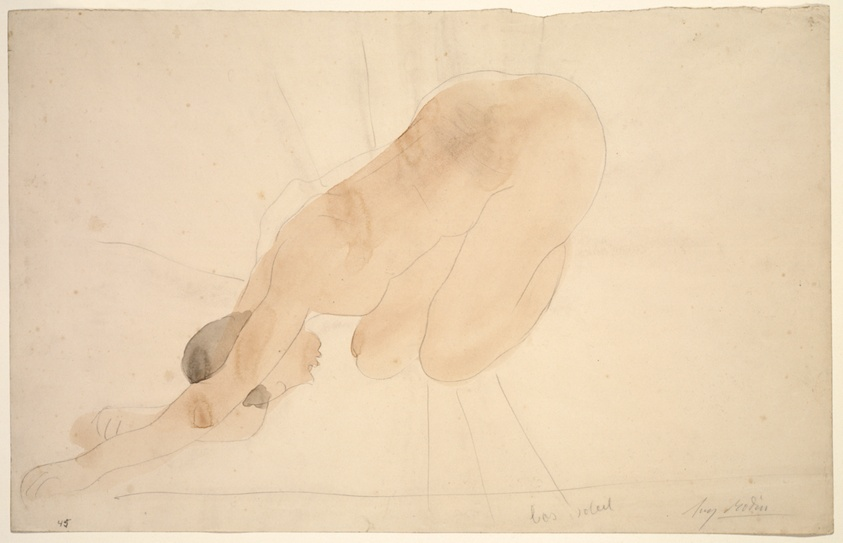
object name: Drawing and Watercolor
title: Sunset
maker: Auguste Rodin (French, 1840-1917)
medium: Watercolor and graphite, with smudging, on cream wove paper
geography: France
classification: watercolor; drawings (visual works); prints and drawing